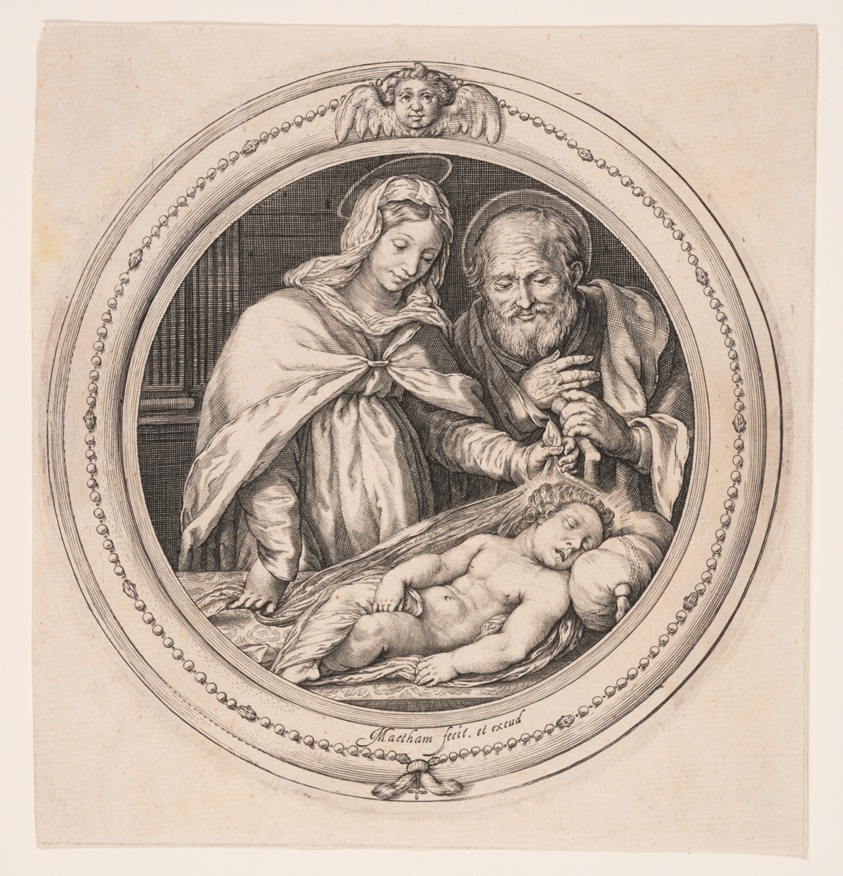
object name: Print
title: The Holy Family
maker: Jacob Matham (Dutch, 1571–1631)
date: c. 1590-1600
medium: Engraving on paper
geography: Netherlands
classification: engraving; paper; print; prints and drawing